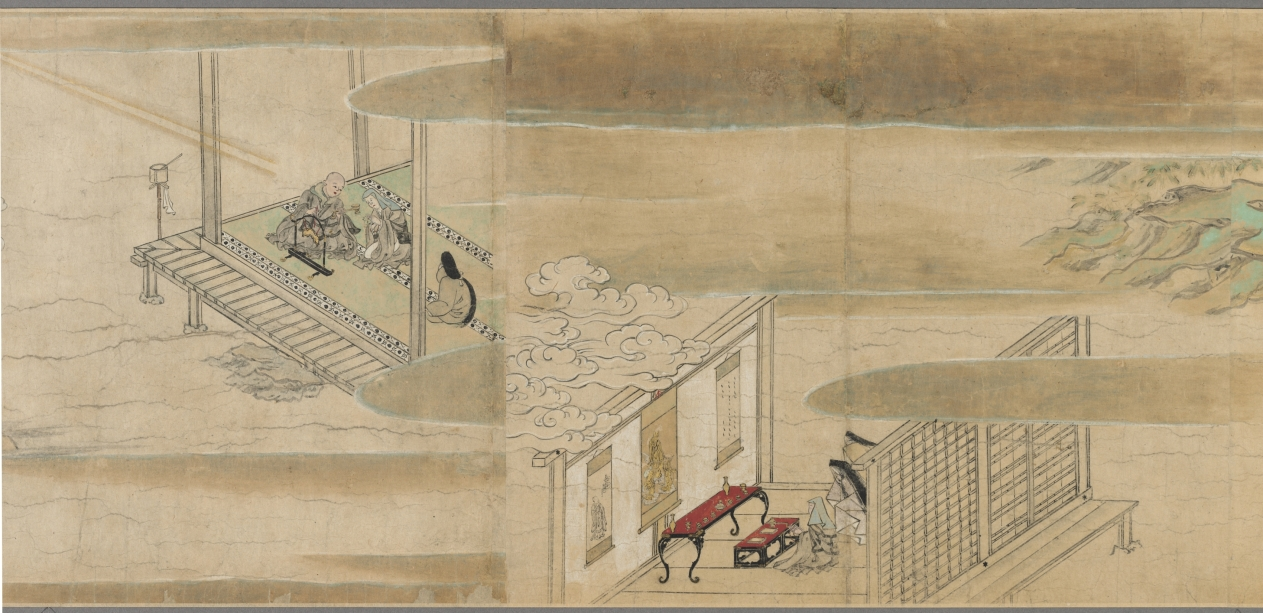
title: The Illustrated Miraculous Origins of the Yūzū Nenbutsu School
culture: Japan, Kamakura period (1185–1333)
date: early 1300s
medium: Handscroll; ink, color, and gold on paper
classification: Painting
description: This painting is the second of a set of two illustrated handscrolls. The first scroll depicts the biography of the Japanese Buddhist monk Ryōnin. This scroll begins with scenes of Ryōnin’s death and relates episodes illustrating the efficacy of following his teachings. Ryōnin asserted the total interconnectedness of all things and the spiritual benefit of chanting the name of the Buddha Amida for one another.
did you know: The other scroll from this two-scroll set belongs to the Art Institute of Chicago.